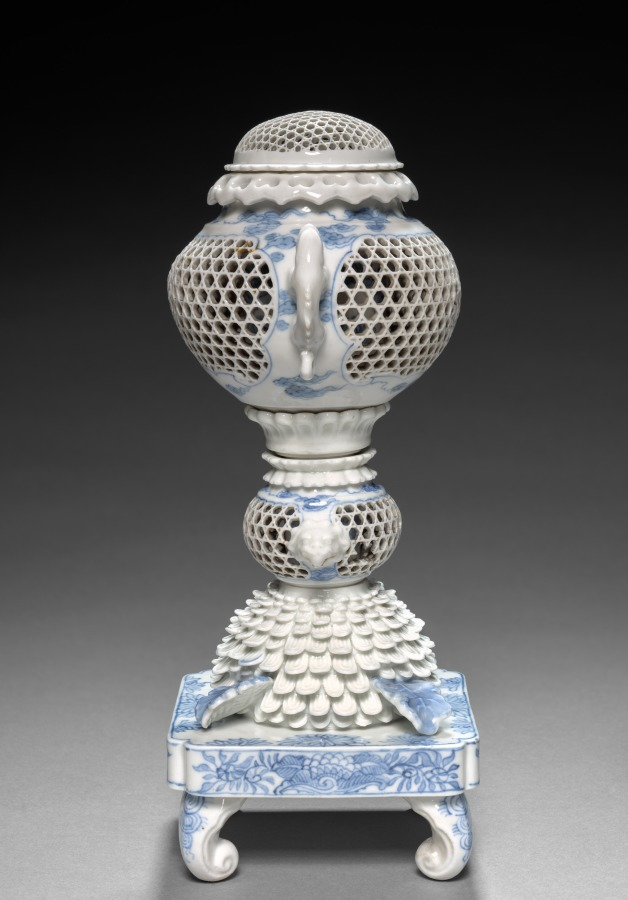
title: Chrysanthemum Censer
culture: Japan, Edo period (1615–1868)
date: 1700s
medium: Porcelain with underglaze blue (Hirado ware)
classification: Ceramic